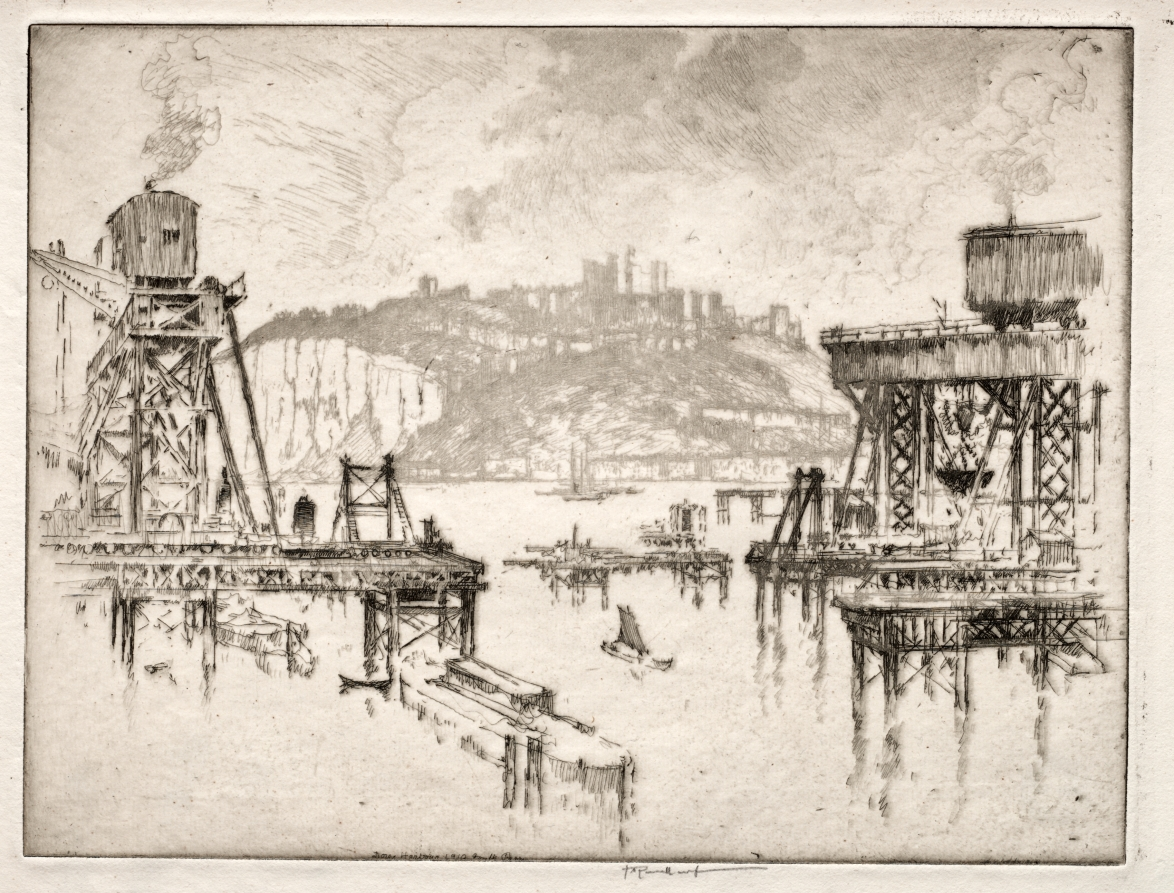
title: Building Dover Pier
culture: America, late 19th-early 20th Century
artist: Joseph Pennell (American, 1857–1926)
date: 1910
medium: etching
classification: Print